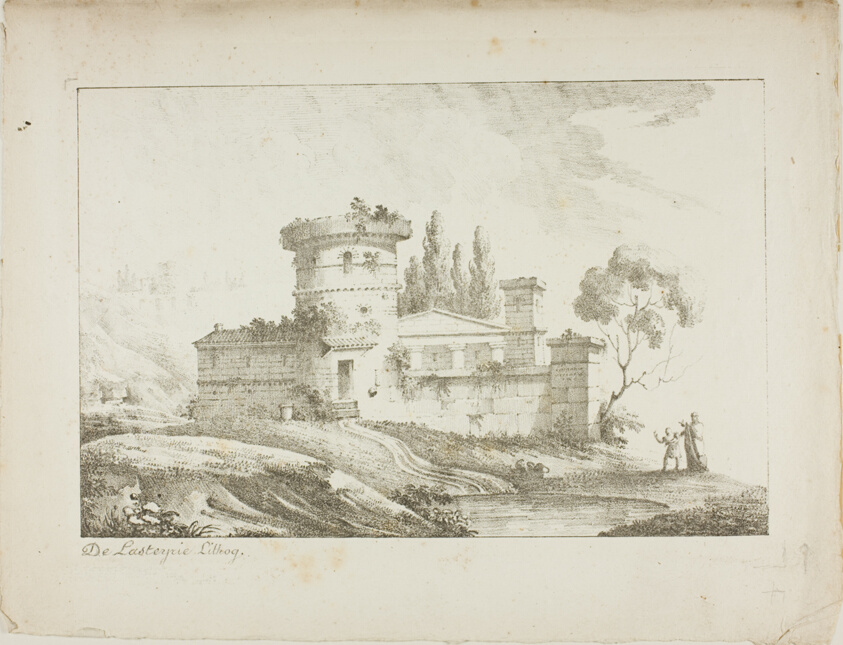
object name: Print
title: Landscape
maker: Lameau (French, active 1803-1822); after Constant Bourgeois (French, 1767-1841); printed by Comte de Charles Philibert Lasteyrie du Saillant (French, 1759-1849)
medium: Lithograph in black on ivory laid paper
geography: France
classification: lithograph; print; prints and drawing